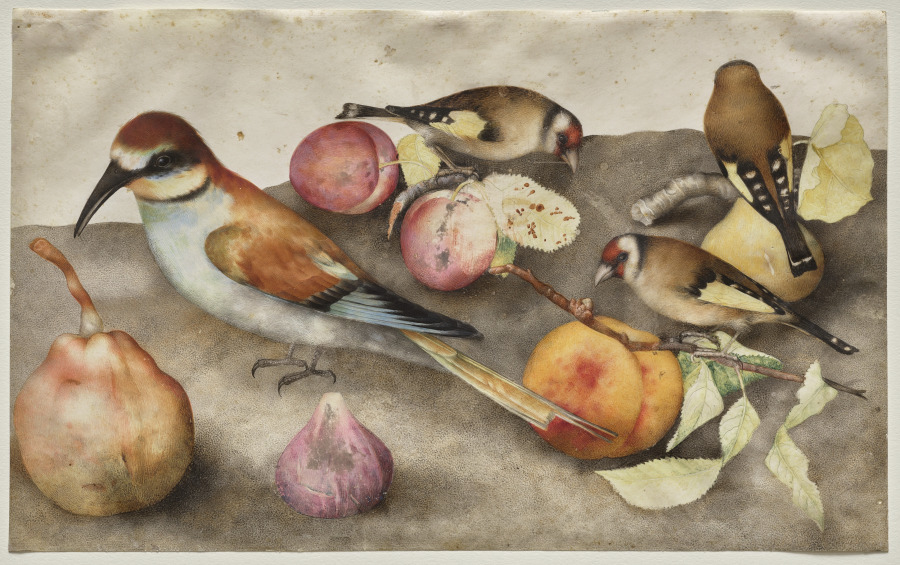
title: Still Life with Birds and Fruit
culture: Italy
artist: Giovanna Garzoni (Italian, 1600–1670)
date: c. 1650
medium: watercolor with graphite, heightened with lead white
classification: Drawing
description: Garzoni was one of the few women artists to achieve prominence in Italy during the 1600s. She garnered fame with her naturalistic still lifes on vellum, which combined scientific accuracy with sensitive artistry. Here, three small goldfinches on fruit branches and a larger bee-eater are dispersed across an earth-toned ground. The goldfinches sit on branches from which hang two plums (left), a peach (center), and a pear (right). A yellow quince and purple fig appear in the left foreground. Garzoni’s refined interpretations of the natural world suited the taste of aristocratic patrons like the Medici family, who acquired her drawings to decorate their villas.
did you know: Giovanna Garzoni was one of just a few women artists to rise to prominence in Italy in the 1600s.